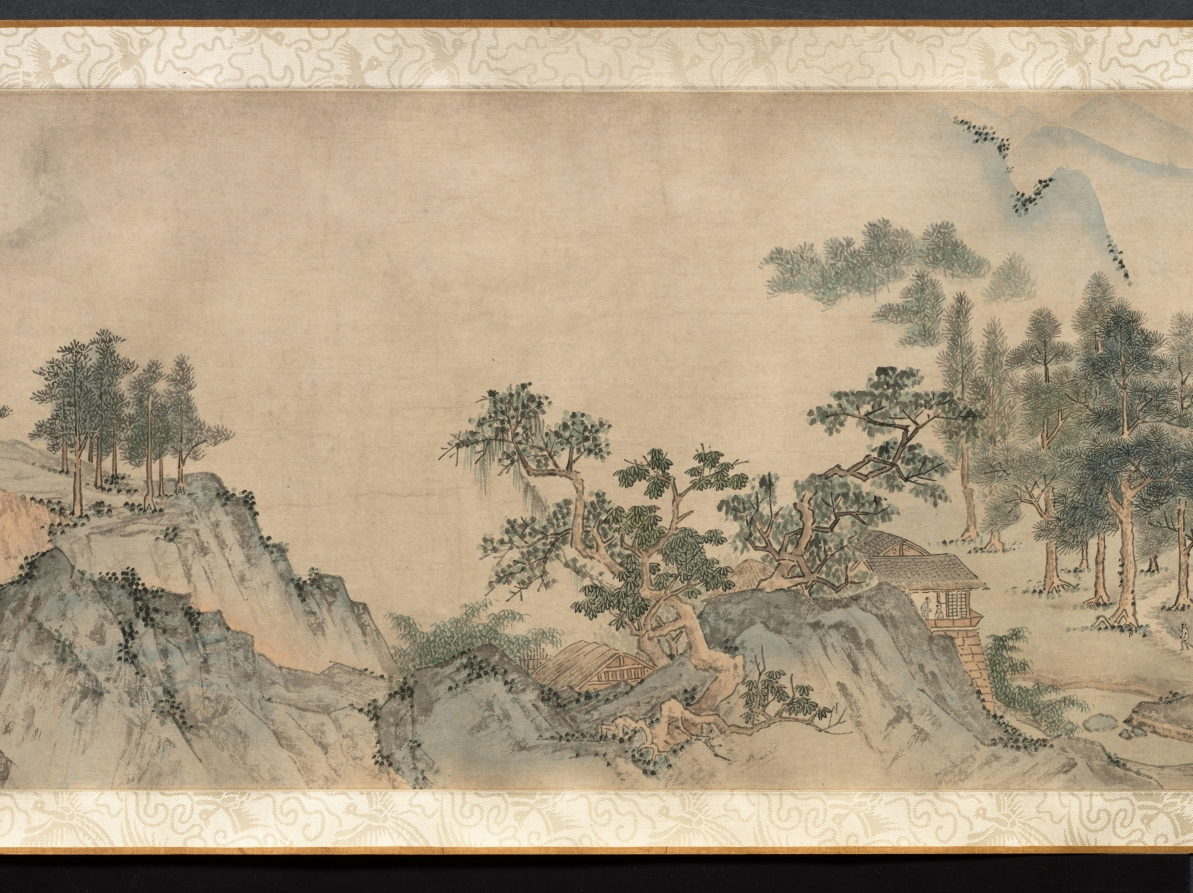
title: Ten Thousand Li of the Yangzi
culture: China, Ming dynasty (1368–1644)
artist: Dai Jin (Chinese, 1388–1462)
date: c. 1400s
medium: Handscroll; ink and color on paper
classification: Painting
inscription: Two colophons at end. Artist's seals: Dai Jin 戴進 and Wenjin 文進.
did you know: Dai Jin is traditionally considered the founder of the Zhe School, a style of landscape painting.